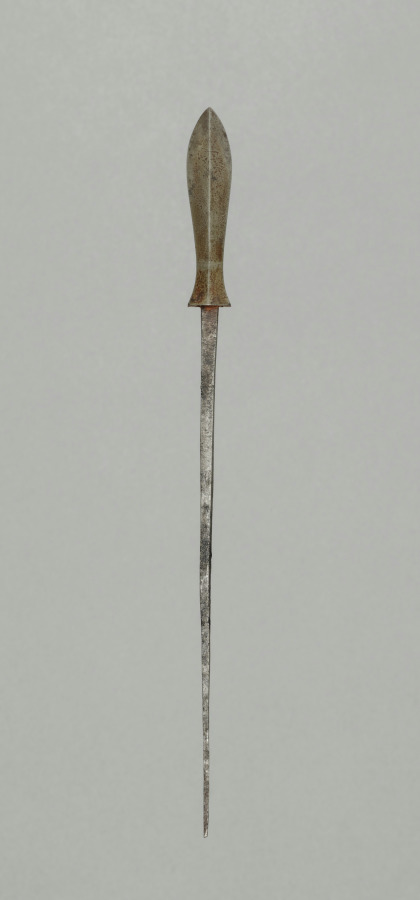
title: Arrow Point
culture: Japan, Edo period (1615–1868)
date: 1700s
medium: steel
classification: Arms and Armor